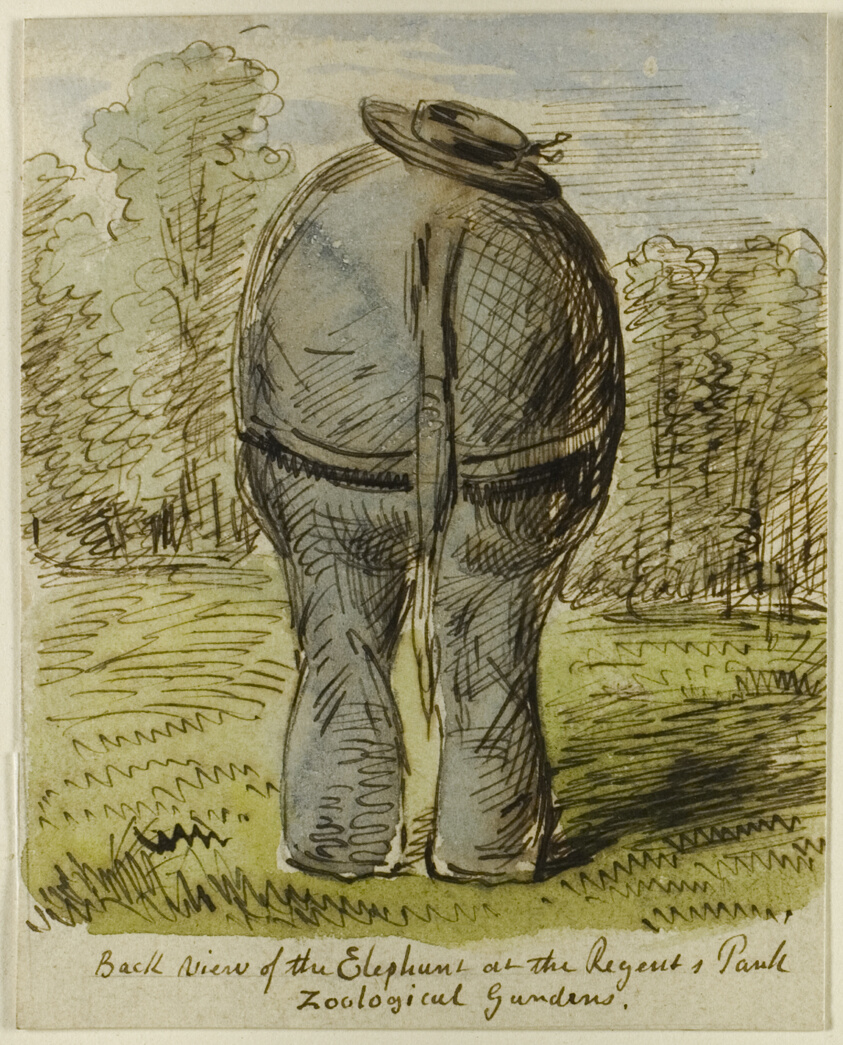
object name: Drawing and Watercolor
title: Back View of the Elephant at the Regent's Park Zoological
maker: John Leech (English, 1817-1864)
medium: Watercolor and pen and brown ink, over graphite, on cream wove paper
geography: England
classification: watercolor; drawings (visual works); prints and drawing